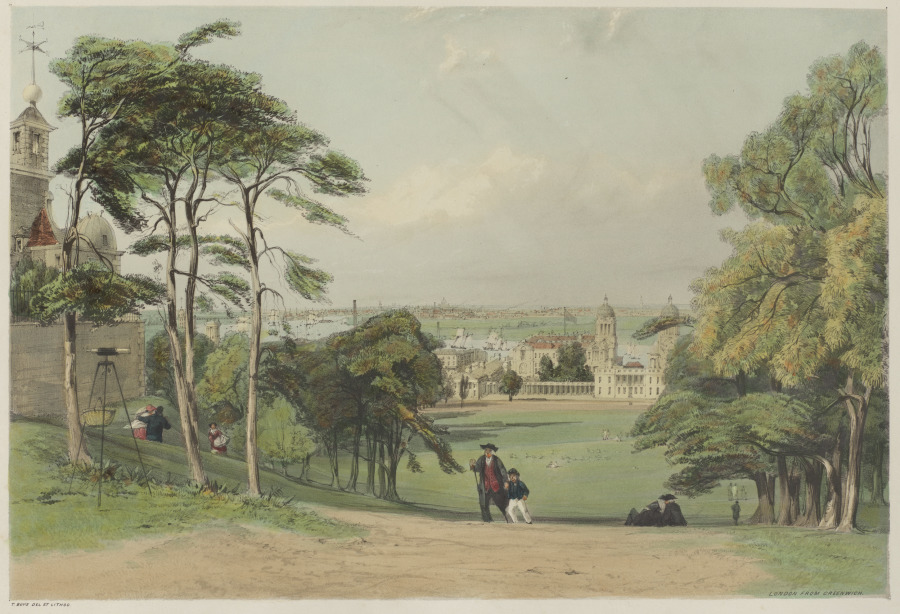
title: London As It Is: from Greenwich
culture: England, 19th century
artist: Thomas Shotter Boys (British, 1803–1874)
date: 1842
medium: lithograph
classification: Bound Volume